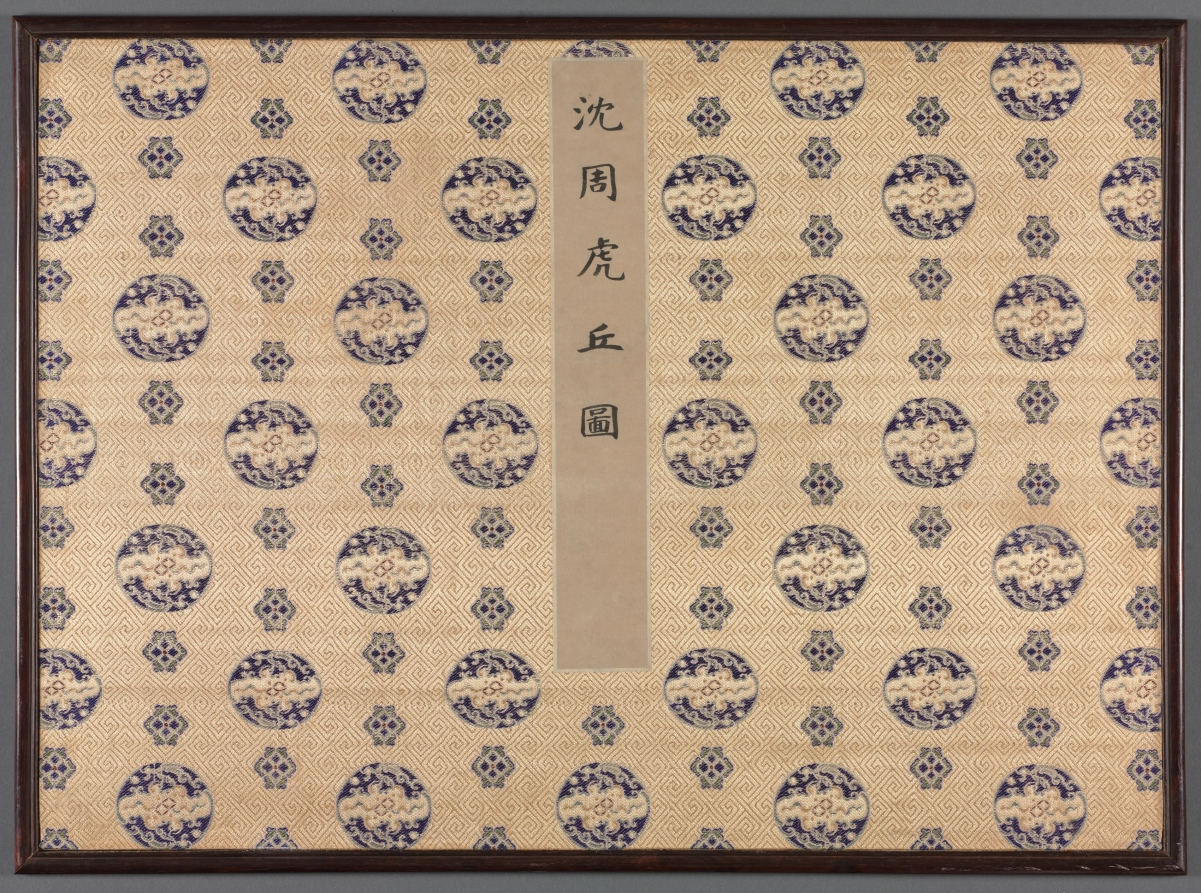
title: Twelve Views of Tiger Hill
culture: China, Ming dynasty (1368–1644)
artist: Shen Zhou (Chinese, 1427–1509)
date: after 1490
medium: Album of twelve leaves; ink or ink and slight color on paper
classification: Painting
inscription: [印] 启南; 石田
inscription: 1 colophon and 1 seal of Yao Yuanzhi 姚元之 (1776-1852). The brushwork of this album is aged and powerful. It is so vigorous that it gives you a feeling of the mist and clouds when looking at it. It could not be done by any other than the old master, Shen Zhou. Formerly the album was in the collection of Hu Zhishou's 胡之壽 family. After many changes of hands, it came finally into the possession of Ligeng 笠耕, the Keeper of the Imperial Stable [that is, Binliang 斌良, Manchurian poet-calligrapher, later the Imperial Resident in Lhasa, Tibet, 1784-1847]. Not long ago, when its former owner Zhishou came to visit me and found the album in my study, he sighed in nostalgia and told me that there were originally an inscription and colophons in the album which are now lost. Song Luo 宋犖 [zi 牧仲, 1634-1713] once had a poem by Shen Shitian on the painting of Tiger Hill. [The poem is missing from the album.] It must be a poem written for this album. However, according to Song's own title, the poem was composed after the rhymes and meter of the original poem on the album. Now there is no poem whatsoever in the frontispiece or at the end of the album. Is this what Zhishou meant - that the original colophons and inscriptions are missing? Ligeng, the Keeper of the Imperial Stable, has asked me for a colophon. The album has been left on my desk since last year. How time has passed! On the first day of the jiashen year 甲申 [1824], I returned from the Court Audience. The plum trees in the pots have started to blossom with their first fragrance. How much has this added to my enjoyment of the painting! I therefore write down a few words for your criticism. [signed] the Student of the Grass Leaf Pavilion, Yao Yuanzhi.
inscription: 3 seals of Hou Shigong 侯士恭 [late 19th–early 20th century]. (1 each on the colophon, seventh, and eleventh leaves).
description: Views of Tiger Hill depicts a historic site a few miles northwest of Suzhou. The scenes simulate a visit from arriving by boat at the foot of the mountain to climbing to Cloudy Cliff Monastery. Representations of the artist’s mature style, Shen Zhou included views in subtle colors in the suite of monochrome scenes. A Suzhou native, Shen Zhou was supported by family wealth and rejected an official career in favor of life as a retired scholar. Turning to painting in midlife, he is regarded as the founder of the Wu School of painting, with its center in Suzhou.